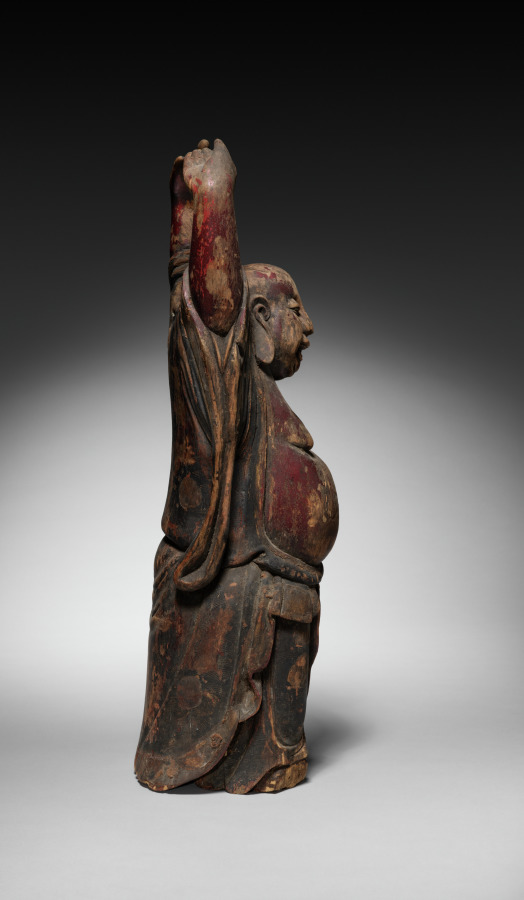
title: The Monk Budai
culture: China, Ming dynasty (1368–1644)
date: 1400s–1500s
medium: wood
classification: Sculpture